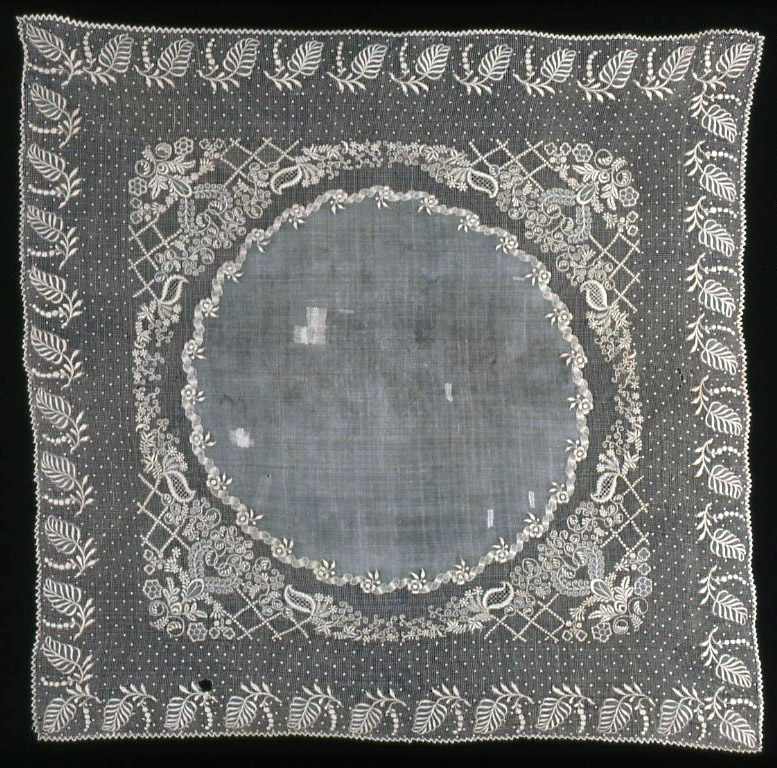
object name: Textile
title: Handkerchief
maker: Philippines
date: c. 1840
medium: Pineapple fiber, plain weave (pina cloth); cut and drawnwork embroidered with silk and cotton in cross, darned squared, darned wheels, interlocking, satin, and single faggot stitches; embroidered with cotton in the back, buttonhole, padded satin, and twined double running stitches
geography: Philippines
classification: textile; weaving; costume accessory